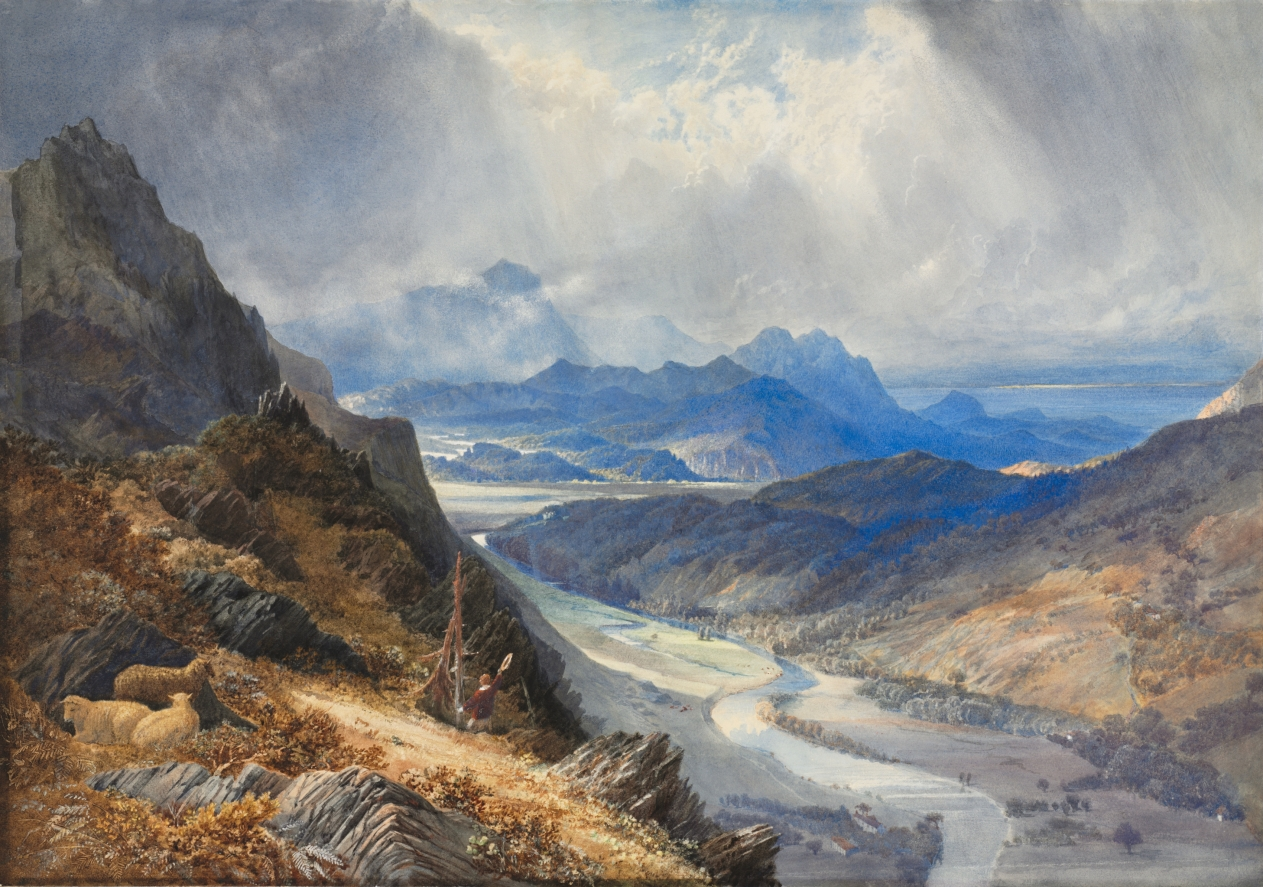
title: A View from Moel Cynwich: Looking Over the Vale of Afon Mawddach and Toward Cader Idris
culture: England, 19th century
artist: William Turner (British, 1789–1862)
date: c. 1850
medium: watercolor with scratch-away, heightened with white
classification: Drawing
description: As a young man, William Turner removed himself from the competitive London art world and returned to his native Oxford to teach and paint in solitude. This retreat may have been because he shared the same name as his contemporary Joseph Mallord William Turner, or it may have been prompted by his apparently retiring personality. He painted prolifically and traveled widely in Britain in search of subjects. This watercolor describes the dramatic mountain scenery of north Wales. The close-up view of the hillside and sheep in the left foreground juxtaposed with the sweeping vista of the mountains of Snowdonia invites a comparison of the minute with the infinite.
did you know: In 1808, William Turner was elected the then youngest member of London's Society of Painters in Water Colours.